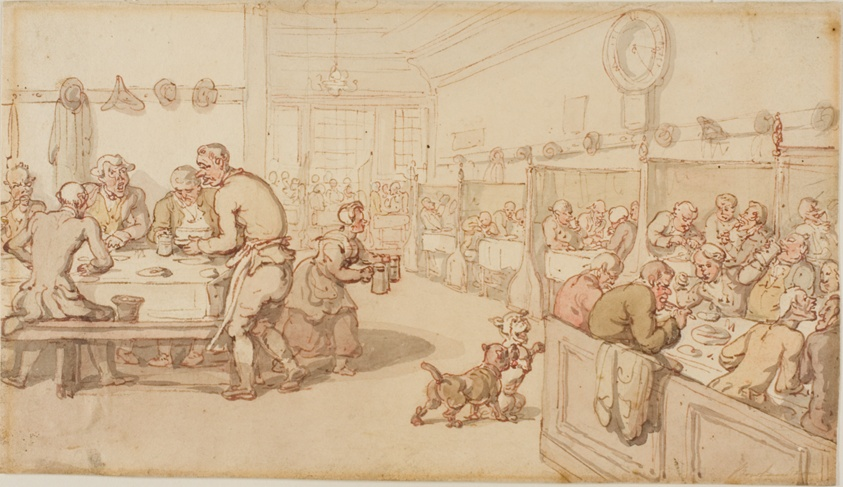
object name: Drawing and Watercolor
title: At an Old English Eating House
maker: Thomas Rowlandson (English, 1756-1827)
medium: Pen and red ink with brush and watercolor over graphite, on cream wove paper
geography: England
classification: watercolor; drawings (visual works); prints and drawing